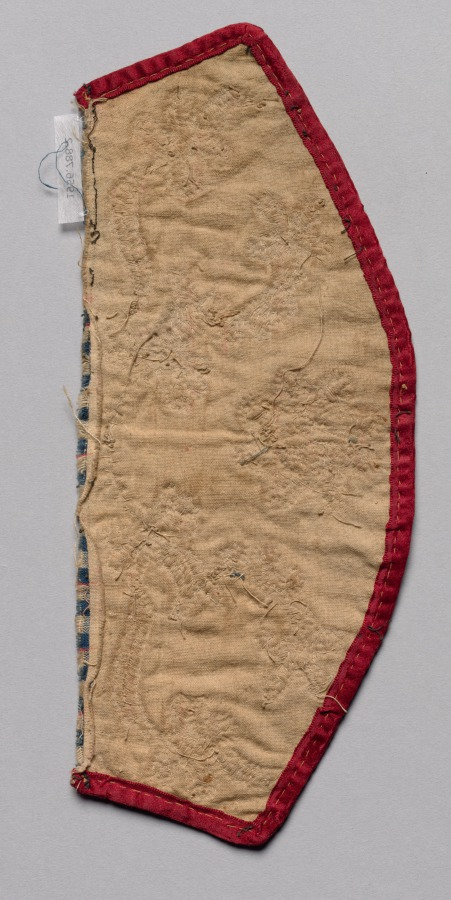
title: Cuff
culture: Northeast Woodlands, Great Lakes Region, Anishinaabe (Ojibwe) or Nehiyawak (Cree) People?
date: late 1800s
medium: Velvet, satin, glass beads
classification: Garment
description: In the 1800s, native peoples began to use European fabrics to fashion fine formal garments; they favored sturdy cloth, such as velvet and wool broadcloth, which provided support for heavy decorative beadwork that was added by hand. Often the fabric was a dark color, providing dramatic contrast for the multicolored beads. Rather than encrusting the entire garment, beadwork was confined to cuffs, “epaulettes,” bib-like plackets and yokes, rectangular panels sewn to leggings, shirts, and dresses, and the like.